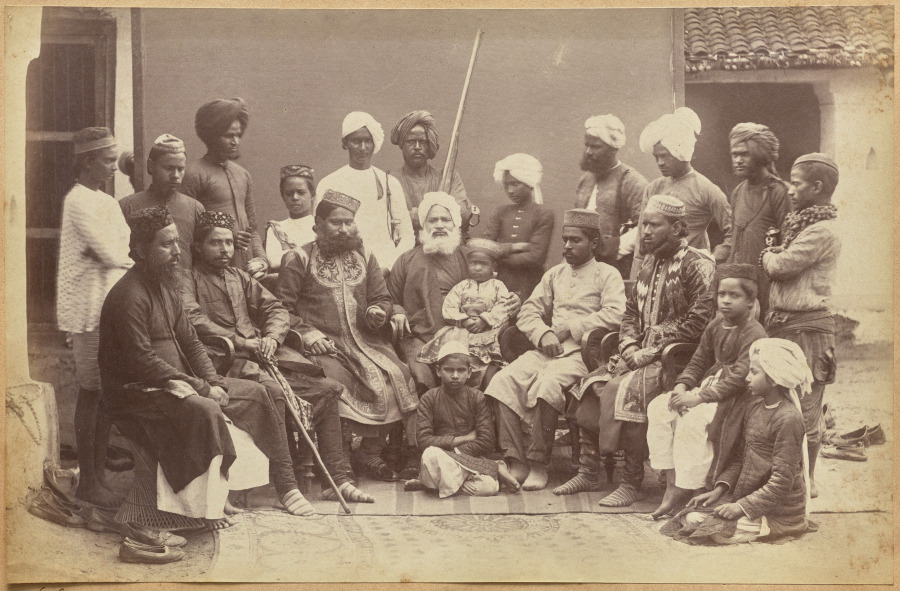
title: Mowhri Rahman Alli Khan family, Rewa (recto, bottom)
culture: India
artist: Raja Deen Dayal (Indian, 1844–1905)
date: c. 1882–87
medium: albumen print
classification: Photograph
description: These photographs are part of an album, now disassembled, of around 105 photographs taken in India between 1885 and summer 1887 that provide glimpses into the lives of the British colonial elite and royal and upper-class Indians. The museum holds another group of 37 pictures from this album (2016.266), which was probably commissioned by a British civil servant visiting or working in India around 1888 as a personal souvenir of his experiences there.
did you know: Raja Deen Dayal is regarded now, and was considered during his lifetime, to be India’s most important 19th-century photographer.